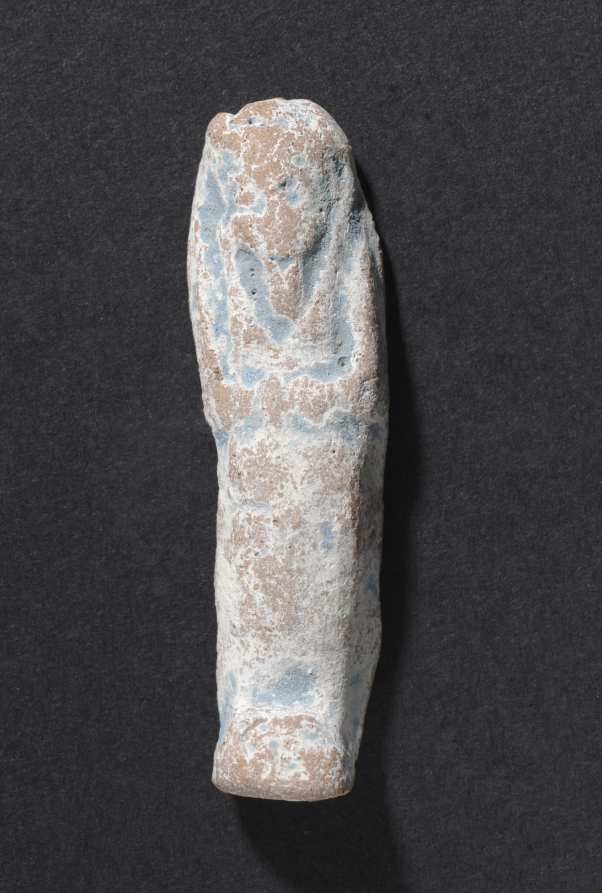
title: Shawabty of Ditamenpaankh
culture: Egypt, Late period (715–332 BCE), Dynasty 25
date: 715–656 BCE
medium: terracotta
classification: Funerary Equipment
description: High demand for shawabtys in the Late Period, a time when as many as 400 or more shawabtys were placed in the tomb with the deceased, gave rise to a specialized container for storing them: the shawabty box. This example is inscribed for the lady of the house, Ditamenpaankh, and was probably one of a pair originally made for her. The single-masted boat on the box's lid is perhaps an allusion to the pilgrimage of the deceased to the holy city of Abydos, the cult city of Osiris, king of the dead. The shawabtys inside are crude, mass-produced examples cast in an open mold. Made of terracotta, their blue paint imitates more costly shawabtys made of faience. As for the shawabty spell, it has been removed from its traditional location on the shawabty's front and relocated onto the sides of box, where it needed only to be written once, thus expediting production.